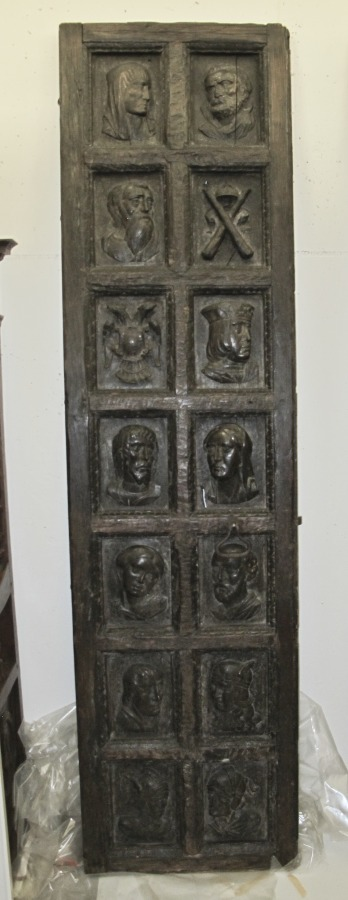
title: Studio Door Pair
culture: Spain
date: 1500s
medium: wood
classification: Furniture and woodwork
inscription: "NON PLUS ULTRA."